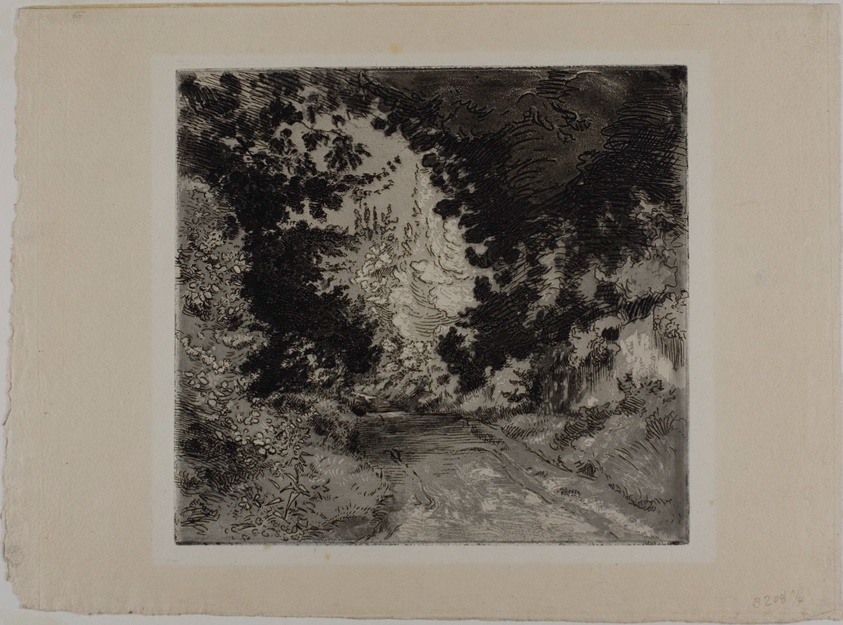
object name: Print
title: Le Chemin de Coutures, à Sèvres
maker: Felix Bracquemond; French, 1833–1914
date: 1871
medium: Etching and aquatint on cream laid paper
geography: France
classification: etching; print; prints and drawing